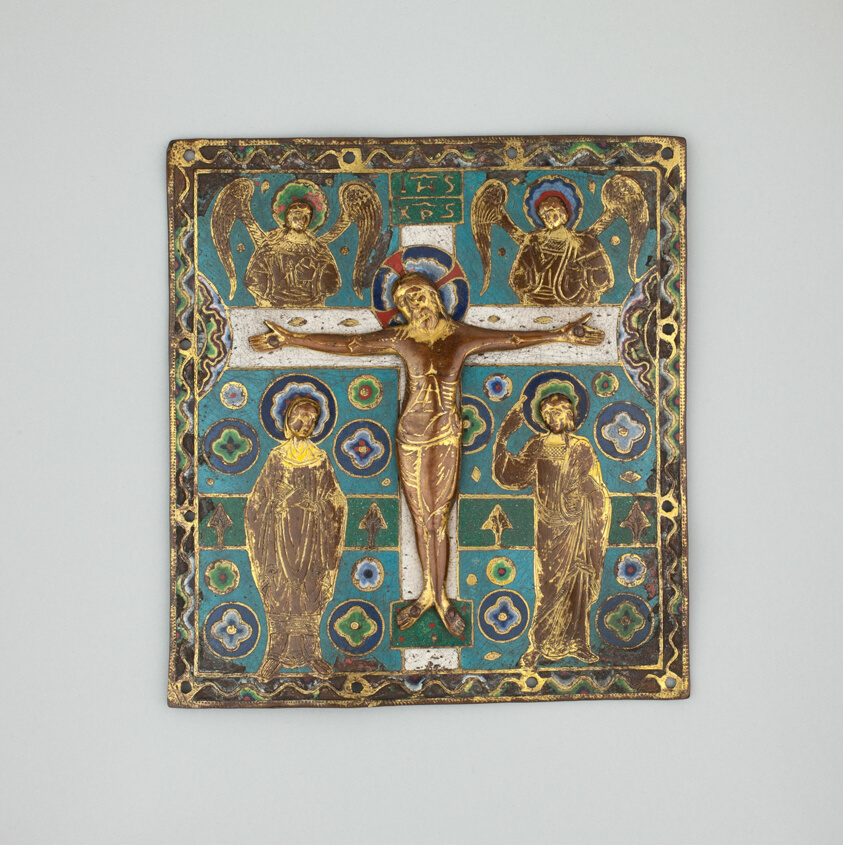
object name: Decorative Arts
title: Plaque with the Crucifixion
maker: French; Limoges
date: 1200/10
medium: Gilt copper, champlevé enamel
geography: Limoges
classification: enamel; european decorative arts; decorative arts